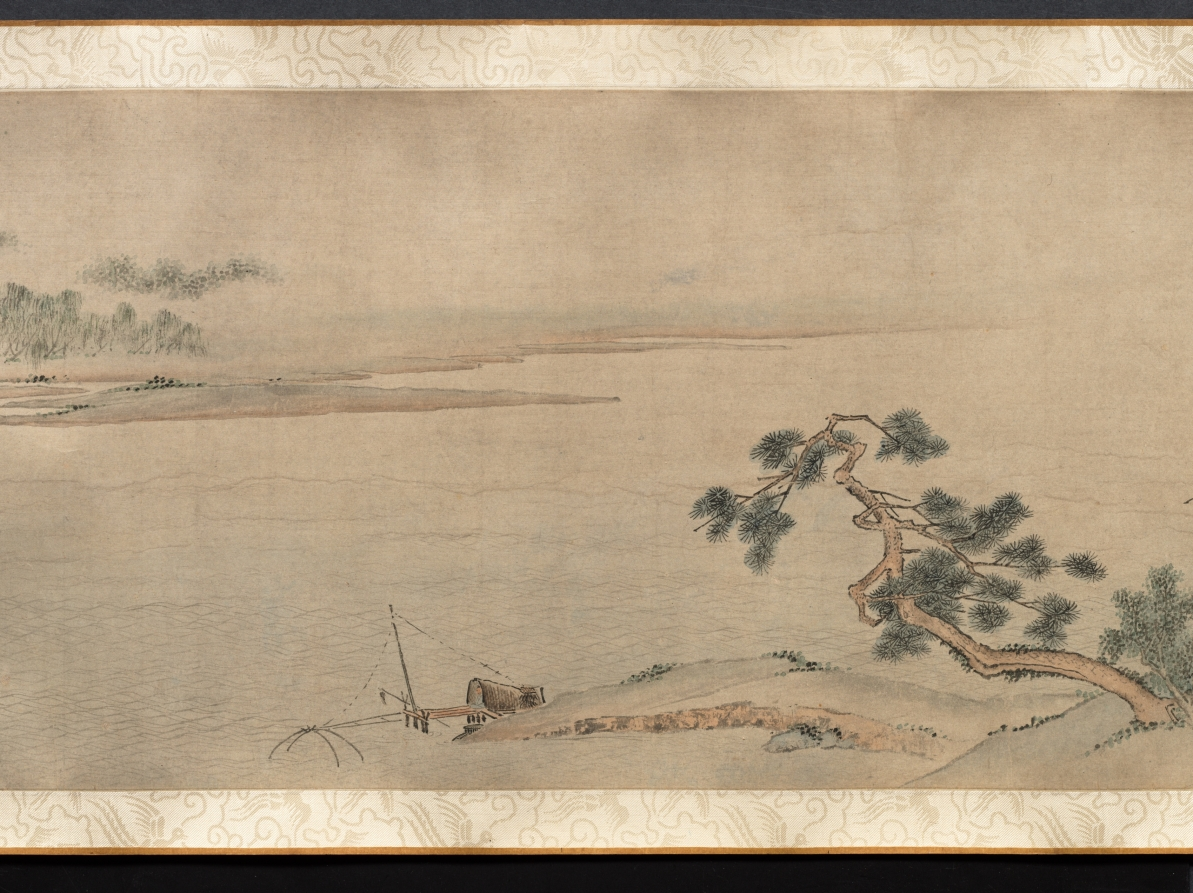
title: Ten Thousand Li of the Yangzi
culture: China, Ming dynasty (1368–1644)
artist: Dai Jin (Chinese, 1388–1462)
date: c. 1400s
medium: Handscroll; ink and color on paper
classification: Painting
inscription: Two colophons at end. Artist's seals: Dai Jin 戴進 and Wenjin 文進.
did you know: Dai Jin is traditionally considered the founder of the Zhe School, a style of landscape painting.